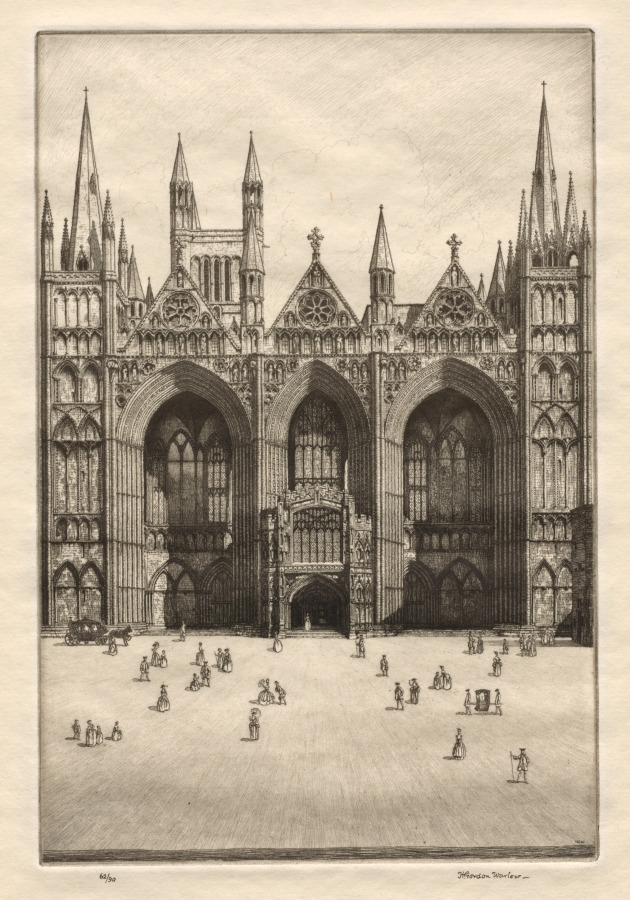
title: Peterboro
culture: England, 20th century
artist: Herbert Gordon Warlow (British, 1885–1942)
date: c. 1930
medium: etching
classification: Print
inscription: signed lower right in black ink, H. Gordon Warlow inscribed lower left in black ink, 62/90 signed in plate lower right, H.G.W. Lower left: 62/90; lower right: H. Gordon Warlow; lower right corner, in graphite: Peterboro